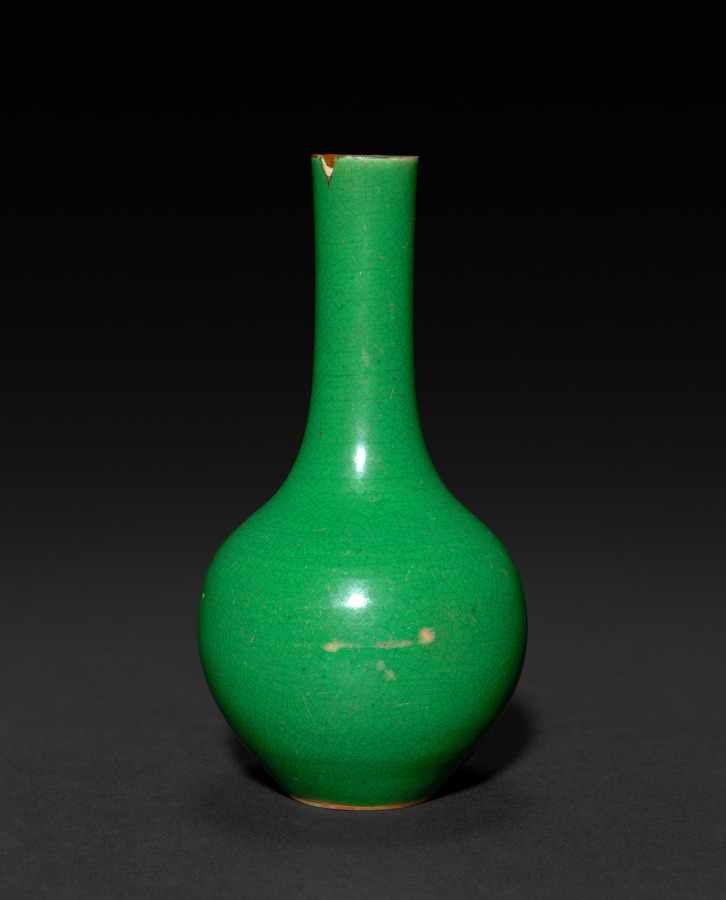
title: Bottle-Shaped Vase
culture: China, Qing dynasty (1644–1911), Qianlong reign (1736–95)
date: 1736–95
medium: porcelain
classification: Ceramic